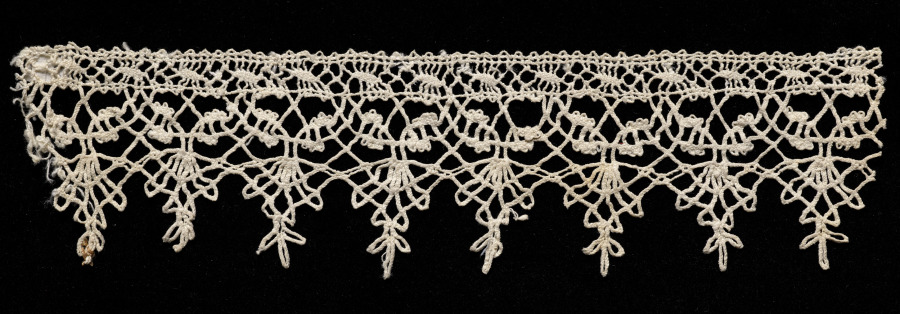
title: Lace Edging of Points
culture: Italy, Venice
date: 1580–99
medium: Bobbin lace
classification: Lace